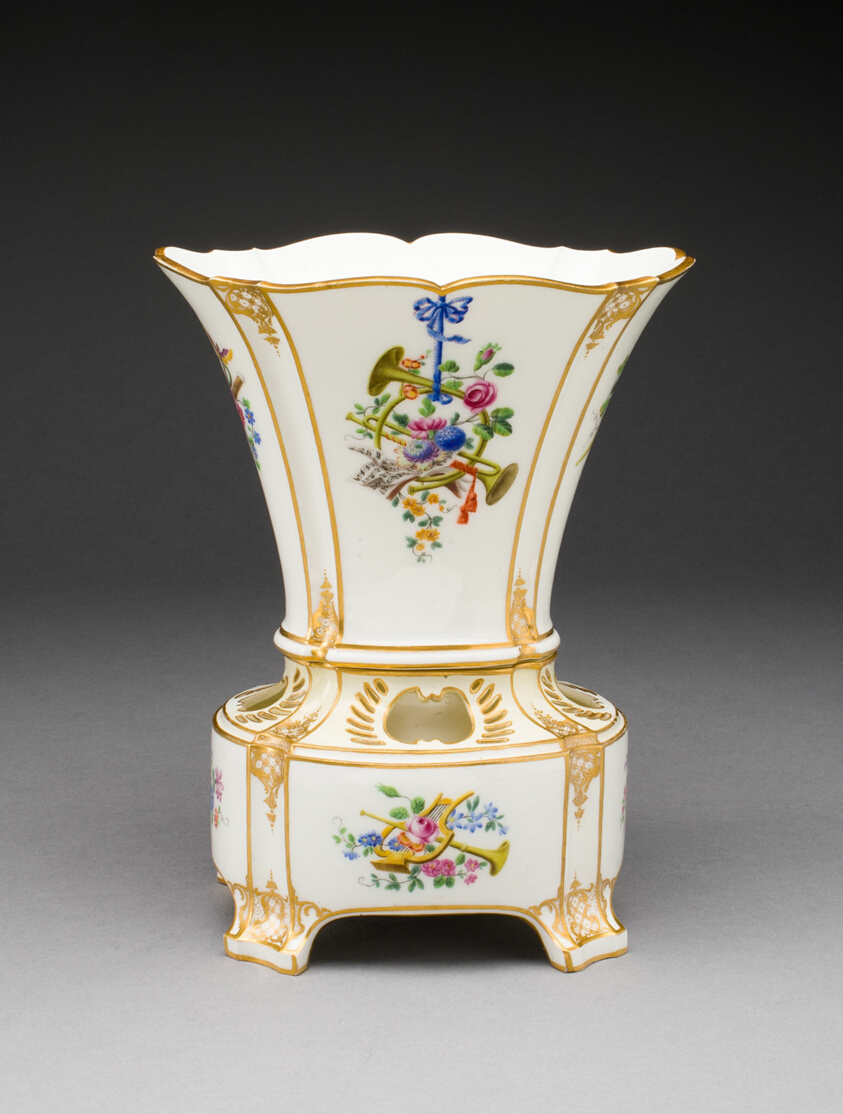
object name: Ceramics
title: Flower Vase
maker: Sèvres Porcelain Manufactory; French, founded 1740; Painted by Charles Buteux; French, active 1756-1782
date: 1759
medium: Soft-paste porcelain, polychrome enamels and gilding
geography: Sèvres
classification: vase; vessel; porcelain; ceramics; european decorative arts